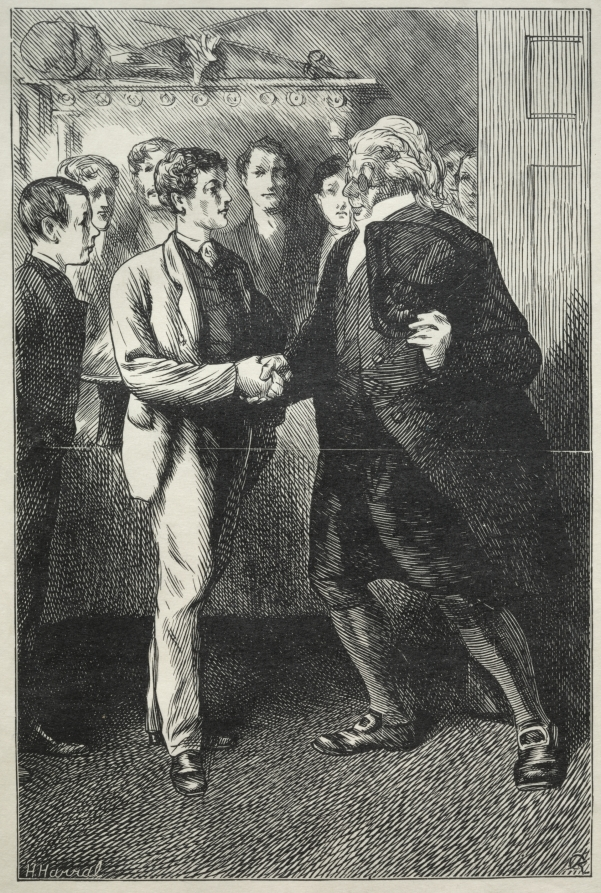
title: Tomkin's Degree Supper and How it Ended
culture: England, 19th century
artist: Horace Harral (British, 1817–1905)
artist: after Charles Samuel Keene (British, 1823–1891)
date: 1868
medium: wood engraving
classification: Print